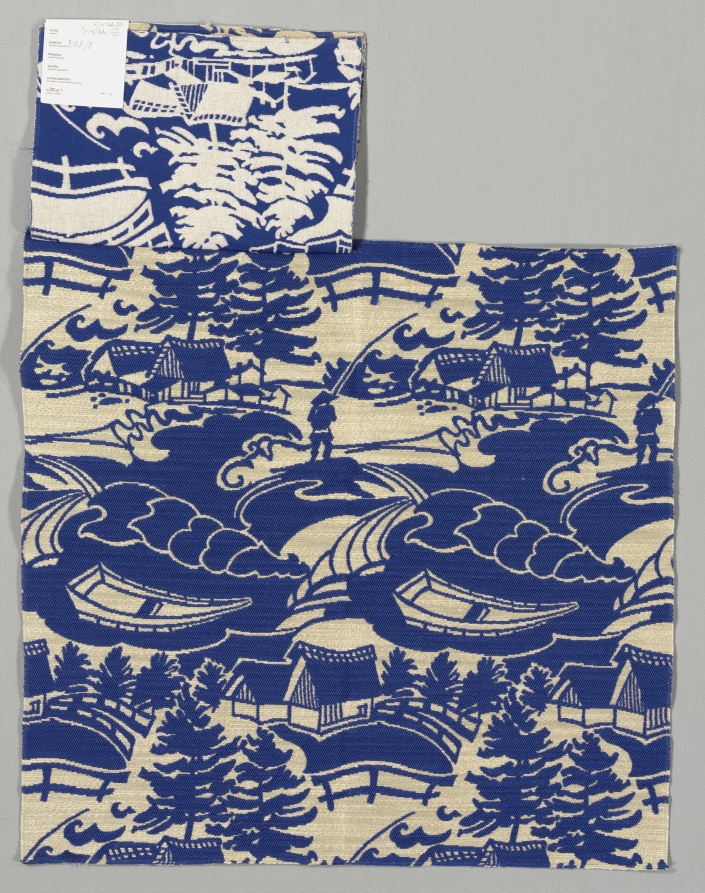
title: Showroom Sample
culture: France, Normandy, 20th century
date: 20th century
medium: damask weave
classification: Textile